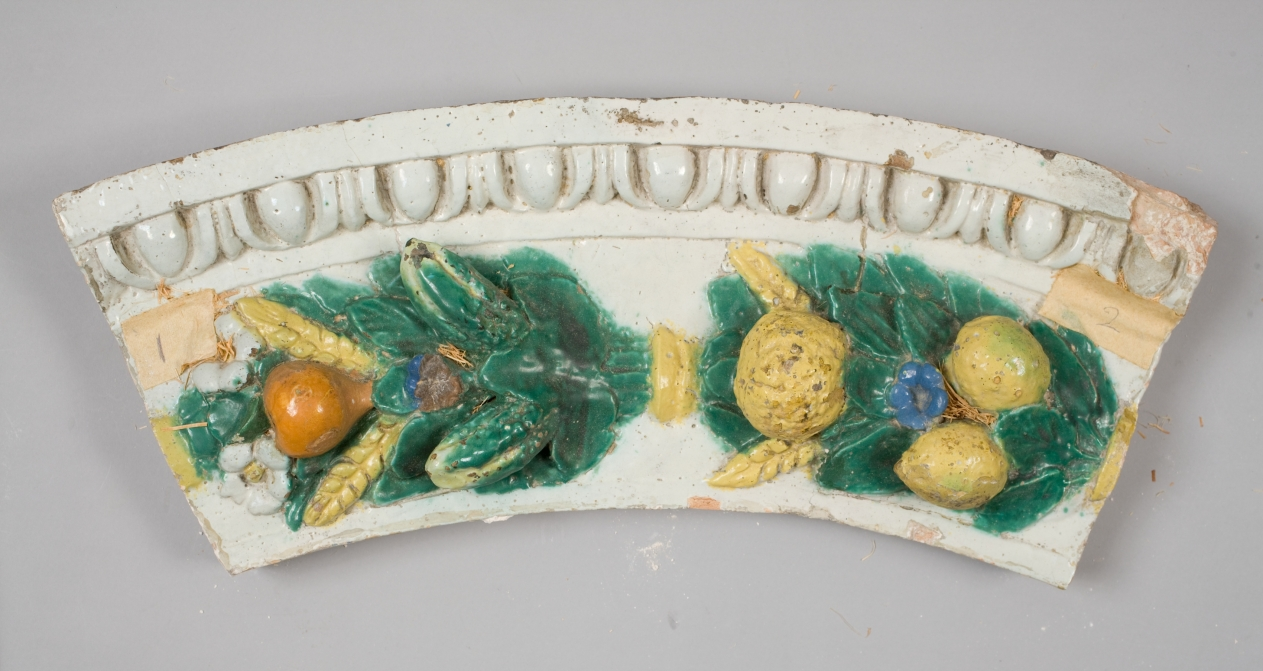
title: Fragment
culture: Italy, Florence, 16th century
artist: Benedetto Buglioni (Italian, 1461–1521)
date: c. 1900–1910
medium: glazed terracotta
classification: Sculpture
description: The Madonna sits upon a throne with the Christ Child standing on her knee. He is steadied by his mother, turning delicately to grasp the Virgin's robe for support. On the left is St. Francis, identified by his stigmata. On the right, St. Anthony Abbot is identified by his monk's robe and T-shaped walking stick. The brown robes of the saints, the purple of the Virgin's tunic (a shade characteristic of the artist), and the flesh tones of the figures contrast strongly against the bright blue background. In the semicircular sky behind the figures, three winged cherub heads emerge, representing a host of angels. The inclusion of St. Francis in this altarpiece honors the saint, suggesting that the altarpiece may have been originally built into the wall of a Franciscan institution in Tuscany. Two shields bearing the Borgherini family crest appear in the lower portion of the altarpiece's border, further suggesting that the chapel for which this altarpiece was made was likely owned or endowed by the family. Glazed terracotta is both durable and decorative and the gleaming white of this piece would have stood out in the darkness of a church. The medium was made popular by Renaissance artist Luca della Robbia and came into fashion as a substitute for expensive carved marble. A rounded arch frame embellished with fruit and flower garlands as well as egg-and-dart and cord moldings accompanied the work when it was acquired, but was later determined not to be original and removed. Buglioni's work bears the influence of the della Robbias, particularly in the simple color scheme. Buglioni likely worked in the studio of Luca's nephew, Andrea, where he would have learned the technique of glazing terracotta.